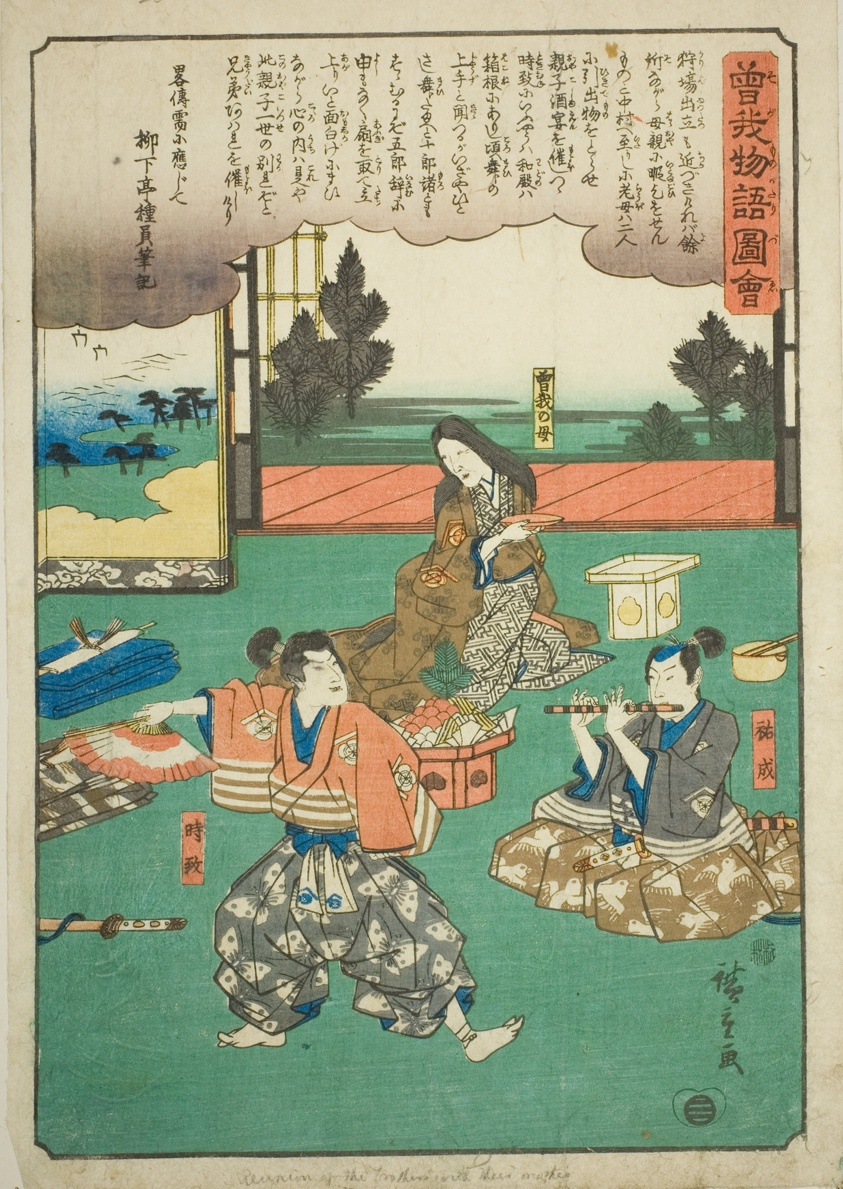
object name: Print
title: Sukenari (Soga no Juro), Tokimune (Soga no Goro), and their mother at a farewell party, from the series "Illustrated Tale of the Soga Brothers (Soga monogatari zue)"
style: Japanese (culture or style)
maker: Utagawa Hiroshige 歌川 広重; Japanese, 1797-1858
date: c. 1843/47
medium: Color woodblock print; oban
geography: Japan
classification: woodblock print; print; asian art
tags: mothers, parents